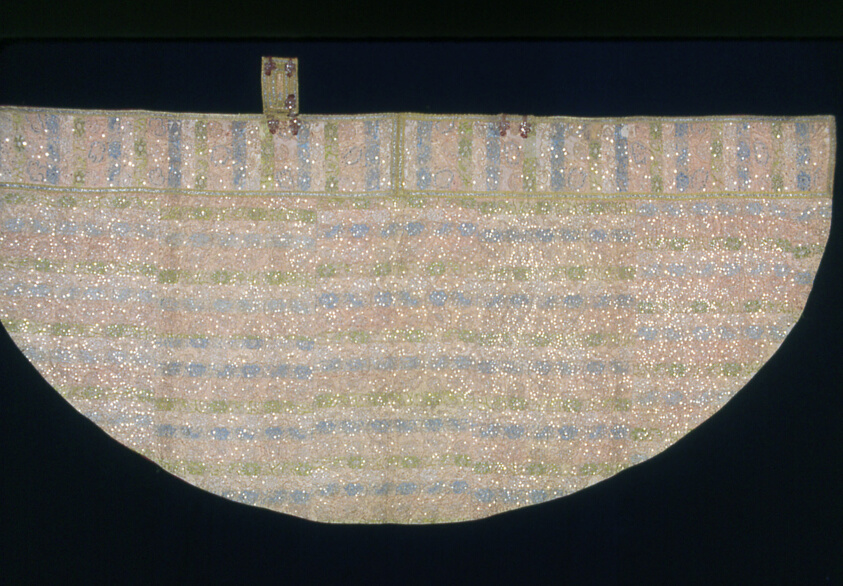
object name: Textile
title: Cope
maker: Italy or Spain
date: 1675/1725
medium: Silk, satin weave self-patterned by ground weft floats; embroidered with gilt- and silvered-metal coil and gilt- and silvered-metal-strip-wrapped hemp in couching and padded couching; glass beads and metal spangles; edged with woven tape; closures of square braiding and in oblique interlacing; embroidered in fishbone stitches; self fringe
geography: Italy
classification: needlework (visual works); liturgical; textile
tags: vestments